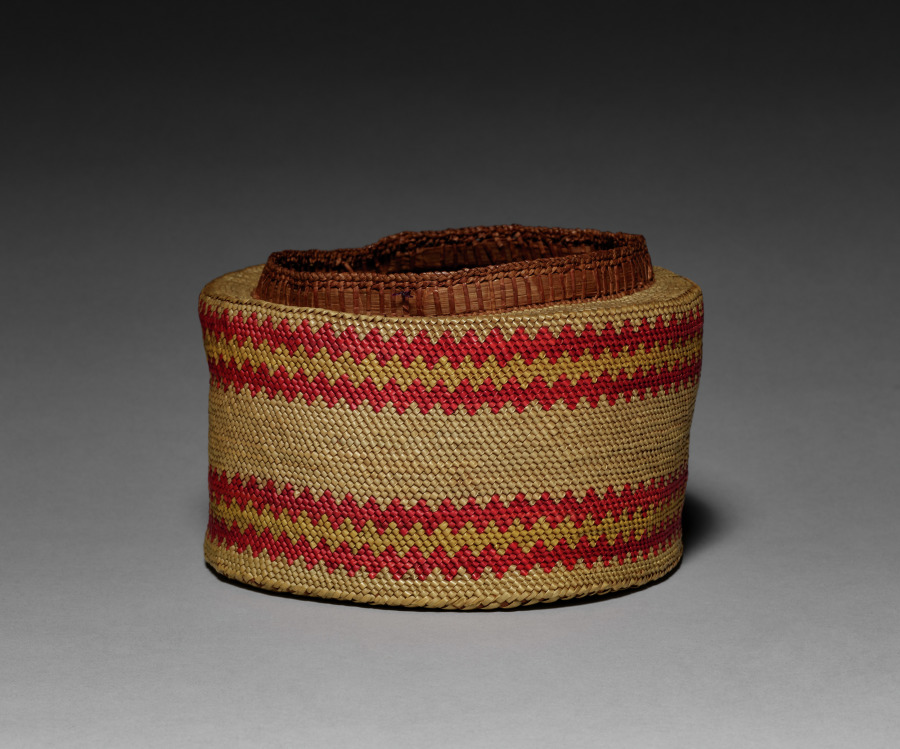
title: Ginger Jar- Shaped Basket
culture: Northwest Coast, Cape Flattery, Washington, Makah, late 19th-early 20th century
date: c 1900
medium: pear grass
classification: Basketry